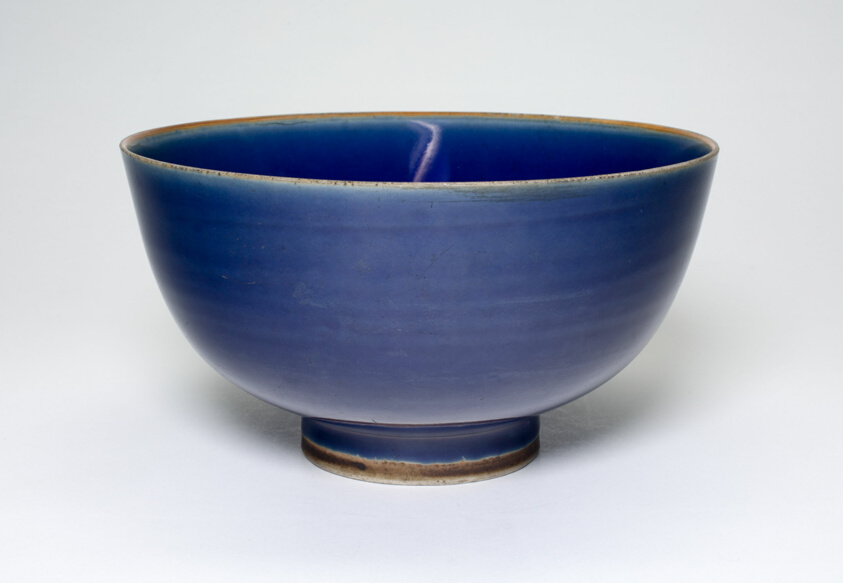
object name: Vessel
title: Bowl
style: Chinese (culture or style)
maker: China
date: Ming dynasty (1368–1644)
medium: Porcelain with royal blue glaze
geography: China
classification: bowl; dish (vessel); asian art; ceramics; vessel